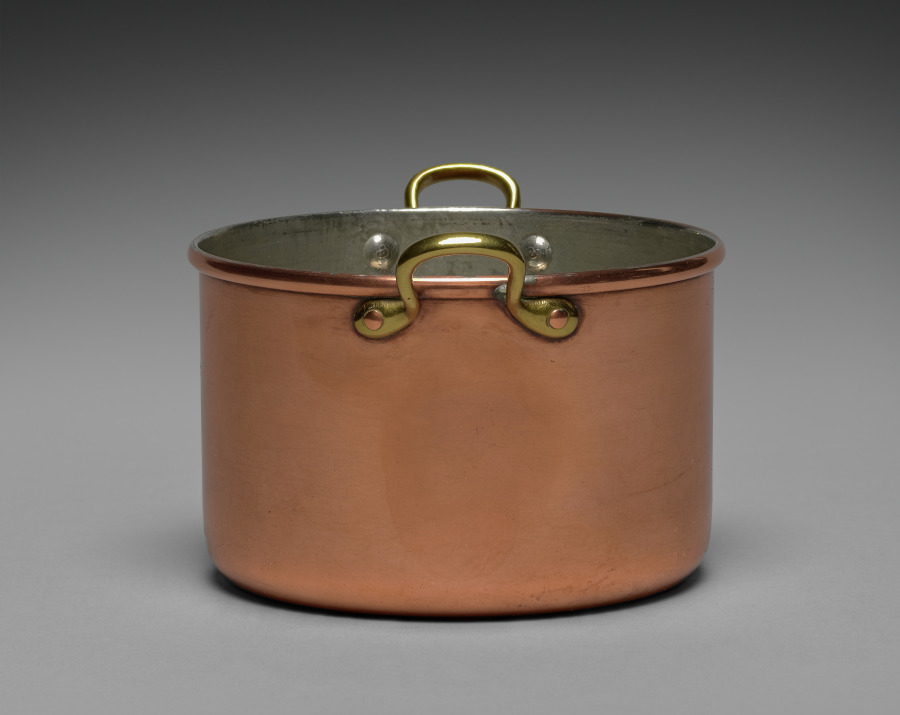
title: Pot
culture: Russia, St. Petersburg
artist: firm of Peter Carl Fabergé (Russian, 1846–1920)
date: 1914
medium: copper with brass handles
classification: Metalwork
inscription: inscribed: War (in Cyrillic), 1914r.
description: As Russia entered the First World War, austerity and economy settled into the fabric of life even among wealthy aristocrats and nobility. Not only were precious materials such as gold, silver, and gemstones hard to procure, but such luxury seemed out of place when so many men were dying at the front. Fabergé contributed to the war effort by making shells, casings, and other munitions out of brass and copper. He also made cookware, such as this small soup pot, to be sent to the front lines with provisions tucked inside. However, these simple forms only looked affordable. They were still a luxury only the wealthiest families could afford to send to their sons.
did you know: This copper soup pot was sent to the front lines filled with provisions during the First World War.